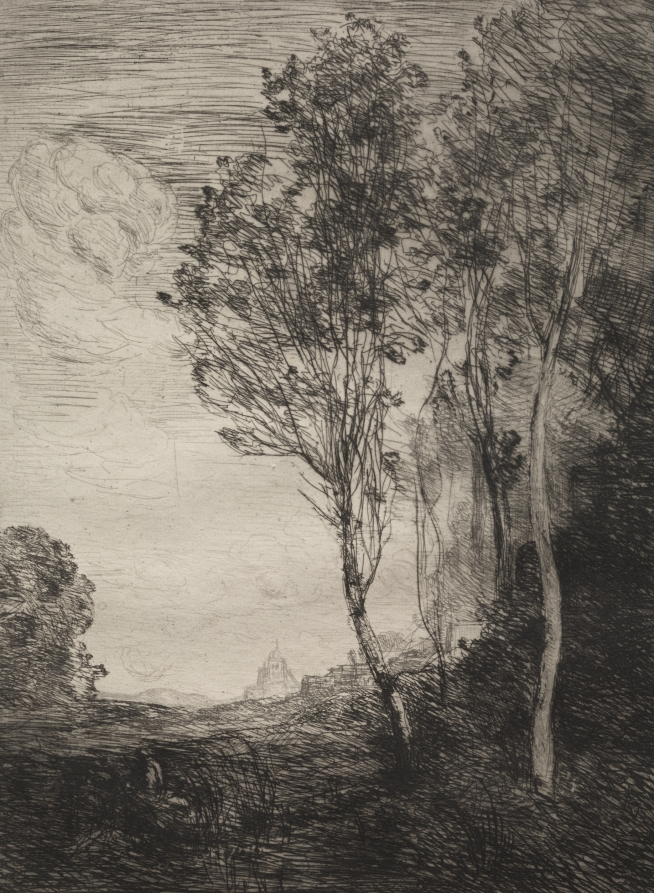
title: Souvenir of Italy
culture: France, 19th century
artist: Jean Baptiste Camille Corot (French, 1796–1875)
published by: Cadart and Chevalier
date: 1866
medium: etching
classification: Print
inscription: lower left, in plate: Corot sculpt; lower right, in plate: Imp. Delâtre, Rue St. Jacques, 303, Paris; lower center, in plate: SOUVENIR D'ITALIE; lower center, in plate: Paris, Publié par A. Cadart & F. Chevalier, Éditeurs, Rue Richelieu, 66; upper right, in plate: 38